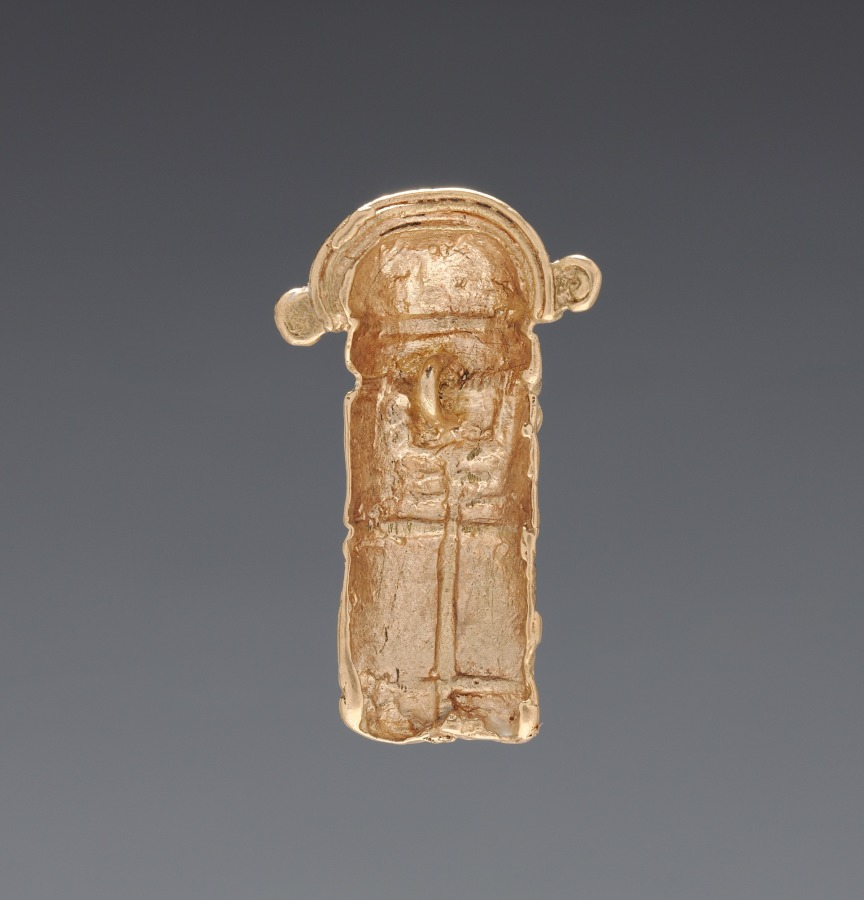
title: Necklace Figurine Bead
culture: Colombia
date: 1–700 CE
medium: cast gold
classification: Jewelry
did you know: Working with gold dates back to at least 500 BC in Ecuador and Colombia.